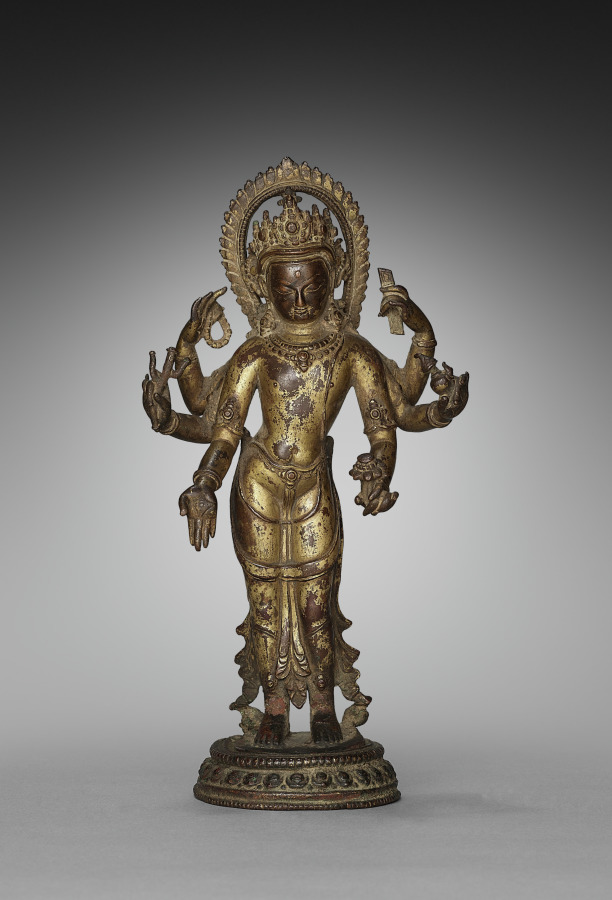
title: Lokeshvara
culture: Nepal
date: 1300s–1400s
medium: gilded copper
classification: Sculpture